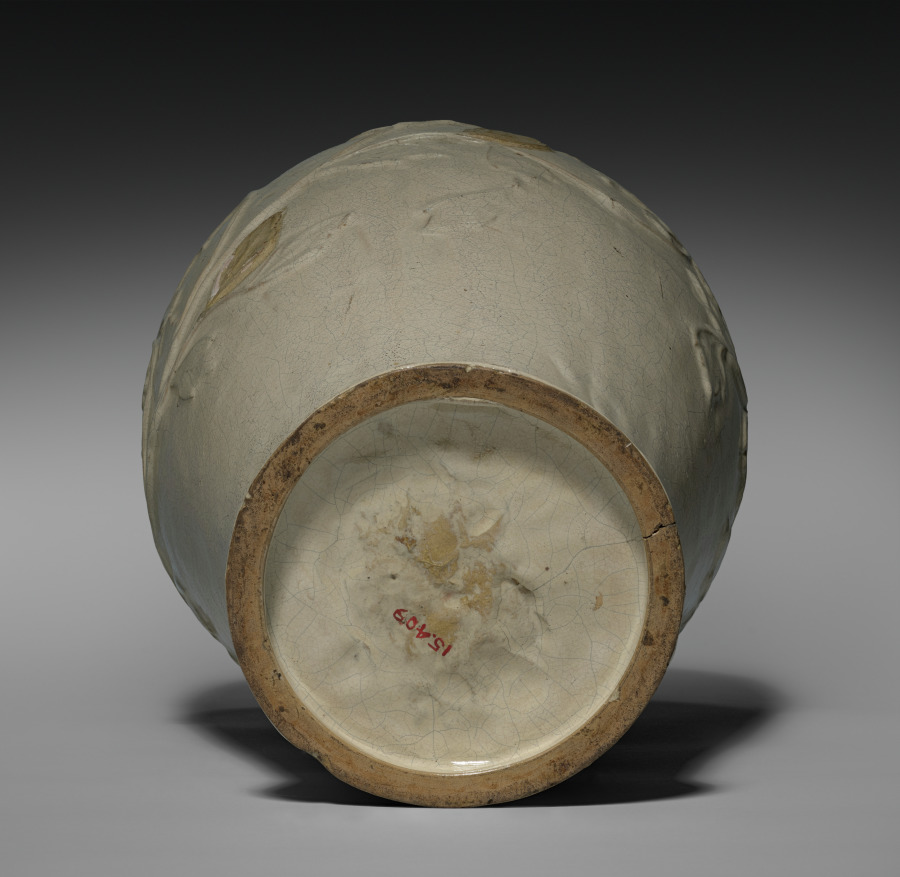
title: Jar: Kuang Tung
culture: China, Qing dynasty (1644-1911)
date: 1644–1911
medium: porcelain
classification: Ceramic